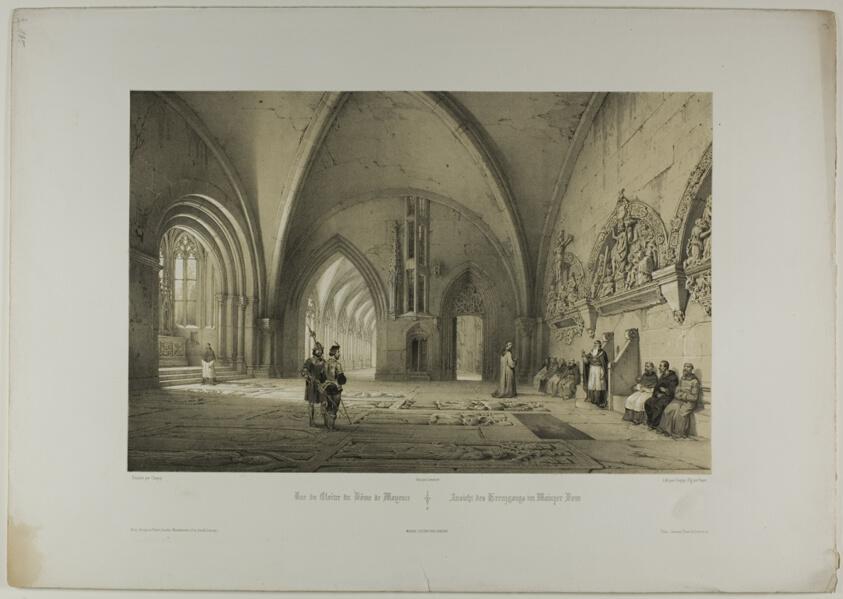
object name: Print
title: View of the Cloister of the Cathedral of Mainz, plate two from Allemande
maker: Nicolas Chapuy (French, 1790-1858) and Buyot (French, active 1848); after a drawing by Nicolas Chapuy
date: 1844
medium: Lithograph from two stones on white wove paper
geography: France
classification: lithograph; print; prints and drawing